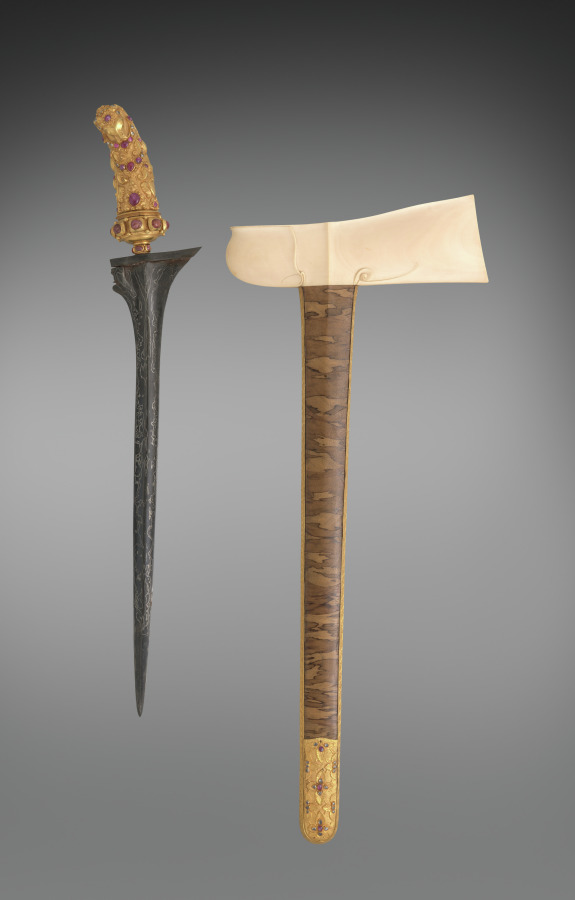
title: Kris and Scabbard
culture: Indonesia, Bali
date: 1800s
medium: metal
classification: Arms and Armor